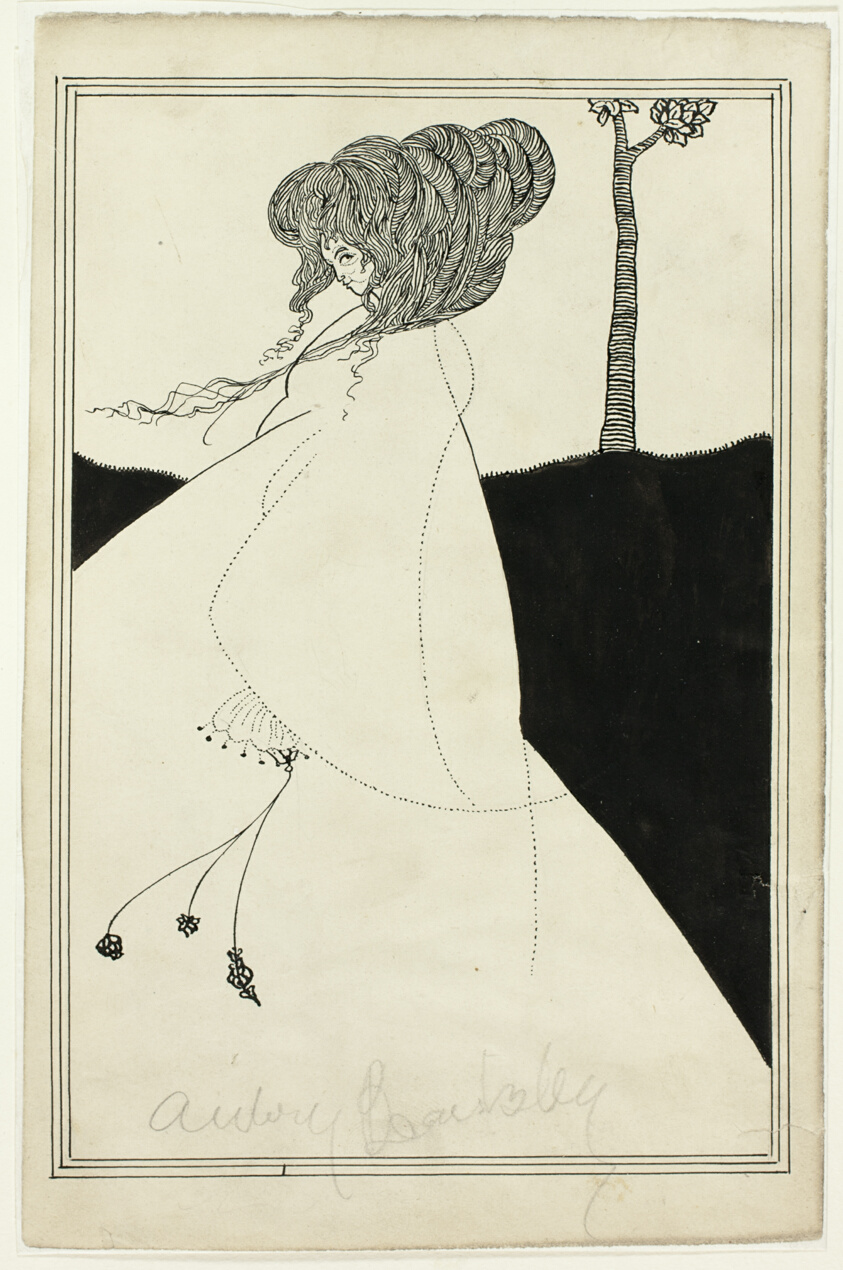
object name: Drawing and Watercolor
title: Woman with Elaborate Coiffure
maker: Aubrey Vincent Beardsley, imitator of; English, 1872-1898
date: 1892/98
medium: Pen and brush and black ink, over traces of graphite, on cream wove paper, laid down on ivory wove paper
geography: England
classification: pen and ink drawings; drawings (visual works); prints and drawing